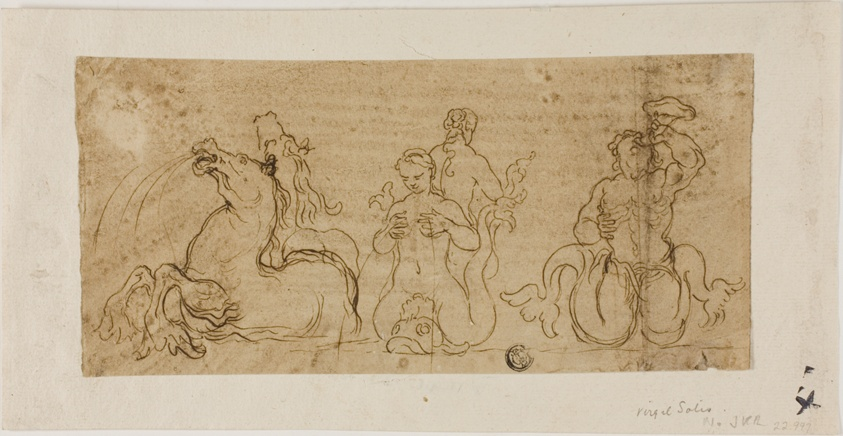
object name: Drawing and Watercolor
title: Fountain Figures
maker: After Gian Lorenzo Bernini (Italian, 1598-1680); or possibly after Perino del Vaga (Italian, 1500/01-1547); or Virgilius Solis, the Elder (German, 1514-1562)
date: 1600-1699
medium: Pen and brown ink on brown laid paper, tipped onto cream laid paper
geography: Italy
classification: pen and ink drawings; drawings (visual works); prints and drawing